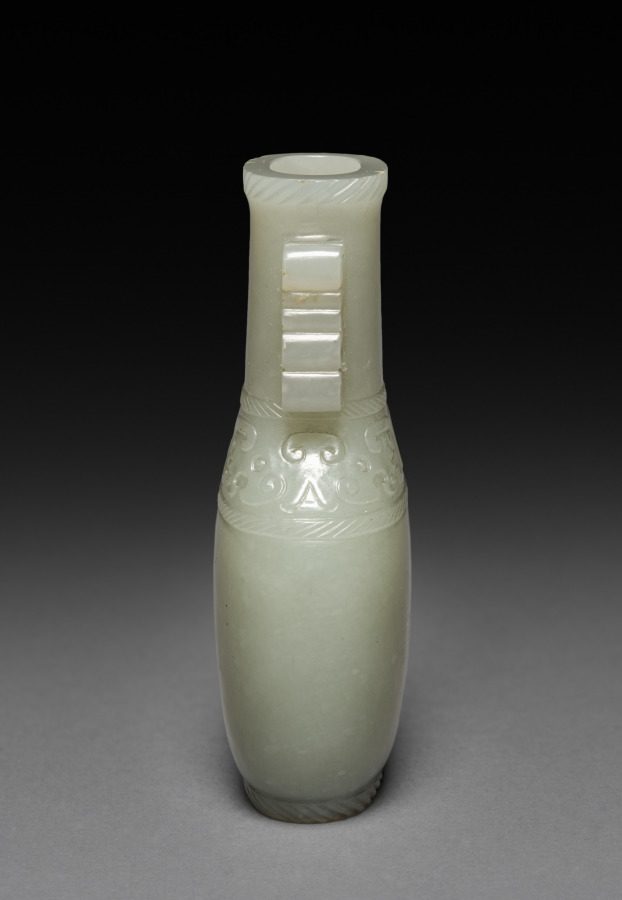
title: Bottle with Stopper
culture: China, Qing dynasty (1644–1911), Qianlong reign (1736–95)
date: 1736–95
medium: jade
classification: Jade